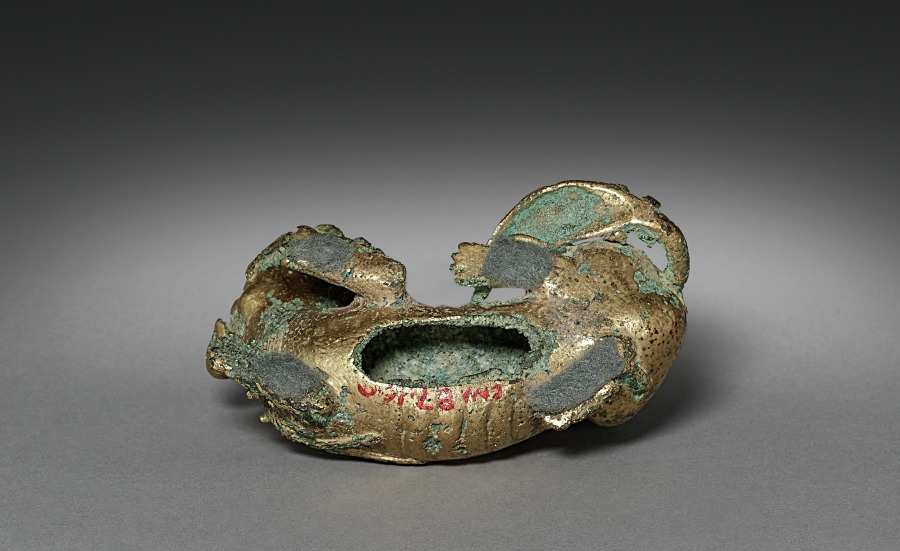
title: Dog-shaped Paperweight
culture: Korea, Unified Silla period (676-935)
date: 676–935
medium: gilt bronze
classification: Sculpture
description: This small object in the shape of a hybrid dog-lion is believed to have been used as a paperweight. Since the Three Kingdoms period (57 BC−668), mercury amalgam gilding had been widely employed to embellish metal objects as well as to make their surface resistant to acids. This technique involves mixing pure gold powder with liquid mercury to form a paste-like mixture. As heat is applied, the mercury evaporates, but an opaque layer of gold remains on the surface. This coating must be polished by first rubbing it with dried rice seedlings, then processing it in ash lye to eliminate impurities; next, the piece is washed and rinsed in a plum vinegar bath.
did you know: This is a dog and lion hybrid.